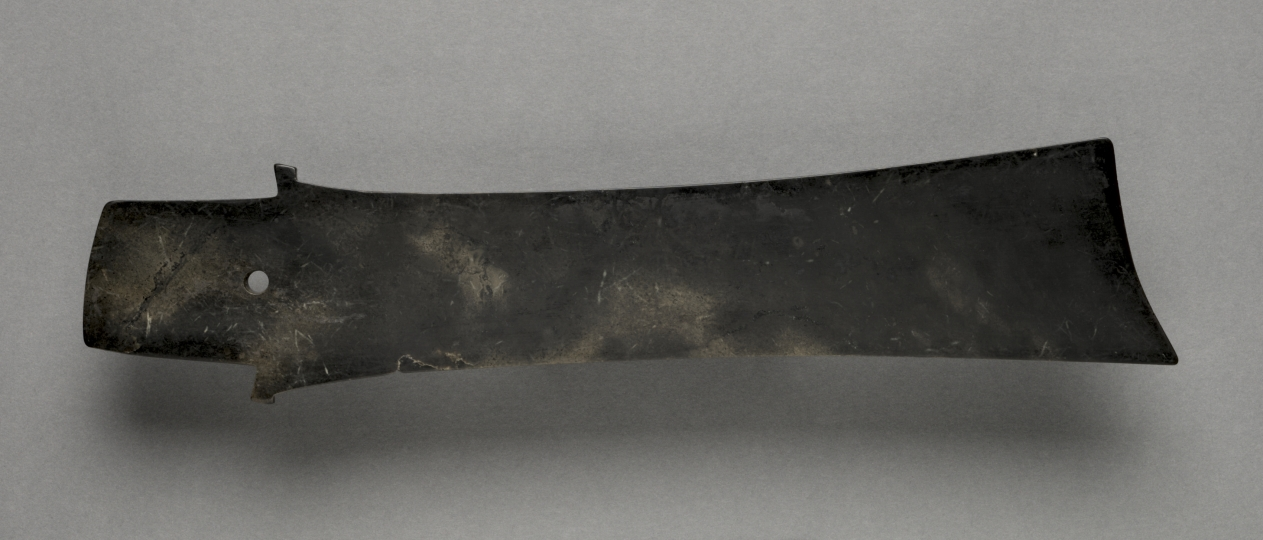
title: Zhang (Ceremonial Blade)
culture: China, Neolithic period (3000s–2000s BCE) to Shang dynasty (c. 1766–1045 BCE)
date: c. 2500–1500 BCE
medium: nephrite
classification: Jade